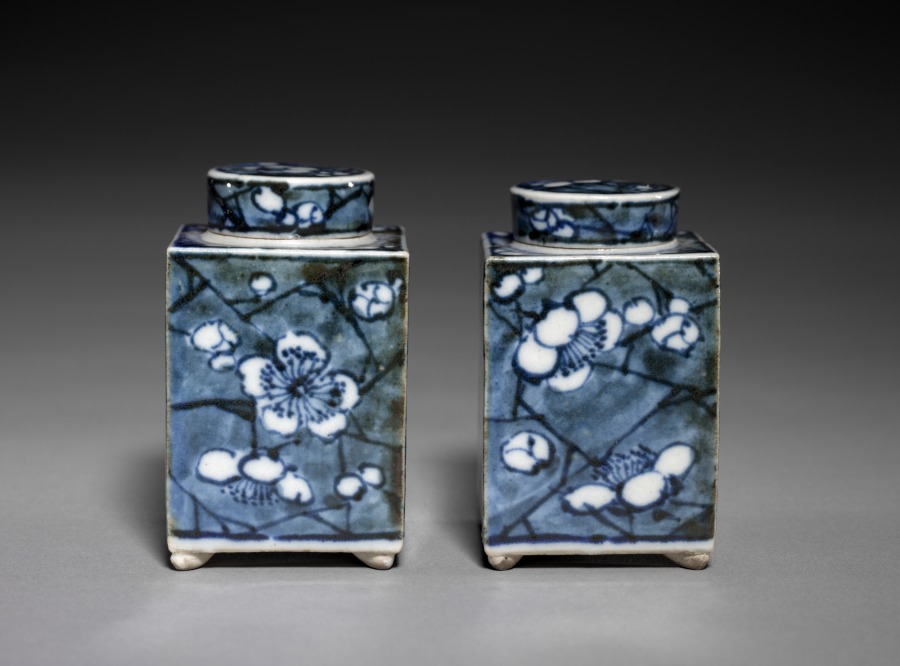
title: Pair of Tea Containers with Plum Blossoms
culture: Japan, Edo period (1615–1868)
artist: Aoki Mokubei (Japanese, 1767–1833)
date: early 1800s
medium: porcelain with underglaze blue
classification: Ceramic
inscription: signed "Ro Mokubei" on base in underglaze blue.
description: Aoki Mokubei, born into a family of restaurateurs, was a potter, calligrapher, painter, and scholar, and is considered one of the three masters of later Edo period Kyoto ceramics. He specialized in porcelains fashioned after Chinese prototypes, and created works for steeped tea (sencha) such as these matching tea caddies decorated in an underglaze blue called sometsuke—literally “with applied dye.” He signed them on their bottoms. They also have intricately patterned silk sleeves to both beautify and protect them. On the exterior of the lid of the outer wooden box that contains them, it is written that Mokubei inscribed and painted an image on the box. On the interior of the lid, the signature and seals of a former owner are written. Mokubei has signed the lid of the inner box, and a charming ink and light color composition of West Lake in Hangzhou in China covers its three sides. On the fourth side is a long inscription by Mokubei describing the scene.